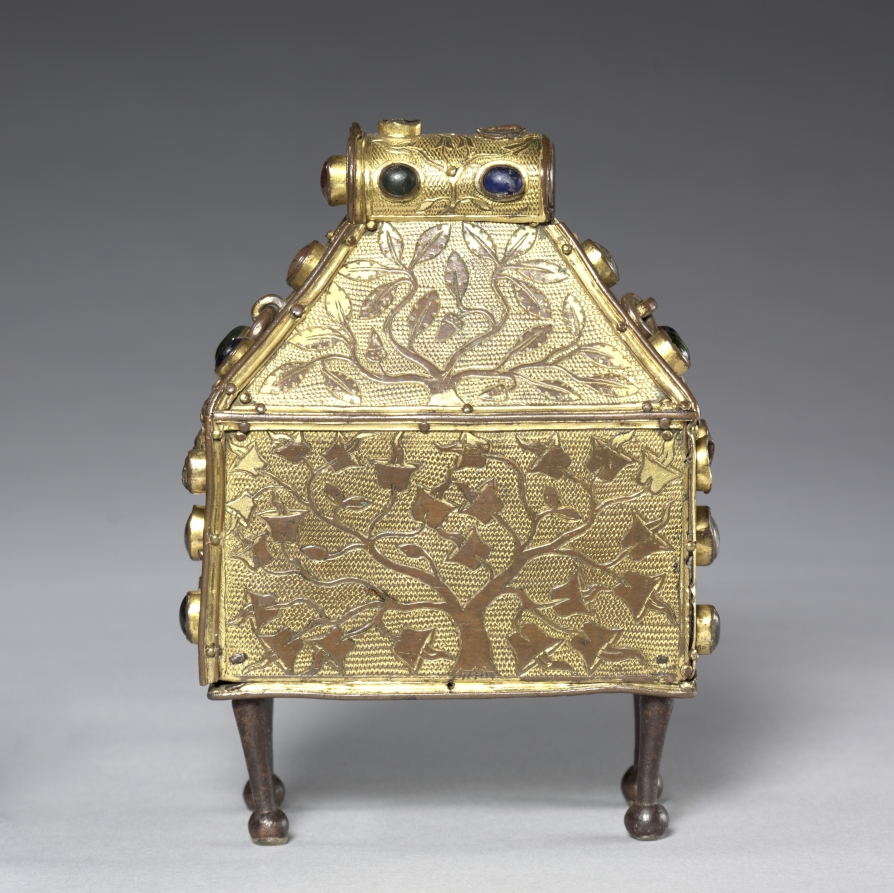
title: Reliquary in Purse Form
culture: Germany, Upper Rhine, Southern Swabia, Gothic period, 14th century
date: c. 1320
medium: copper, gilded and engraved; glass; rock crystal; precious stones; wood core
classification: Metalwork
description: This precious reliquary, adorned on its front and sides with colored glass, precious stones, and two medallions featuring the enthroned Virgin and Child and an eagle, forms part of a group of closely related objects manufactured in the Upper Rhine region shortly after 1300. The purse shape, with its peaked roof and cylindrical top, derives from much earlier Carolingian and Romanesque prototypes. The reliquary was originally suspended from the rings on both sides of the sloping roof.